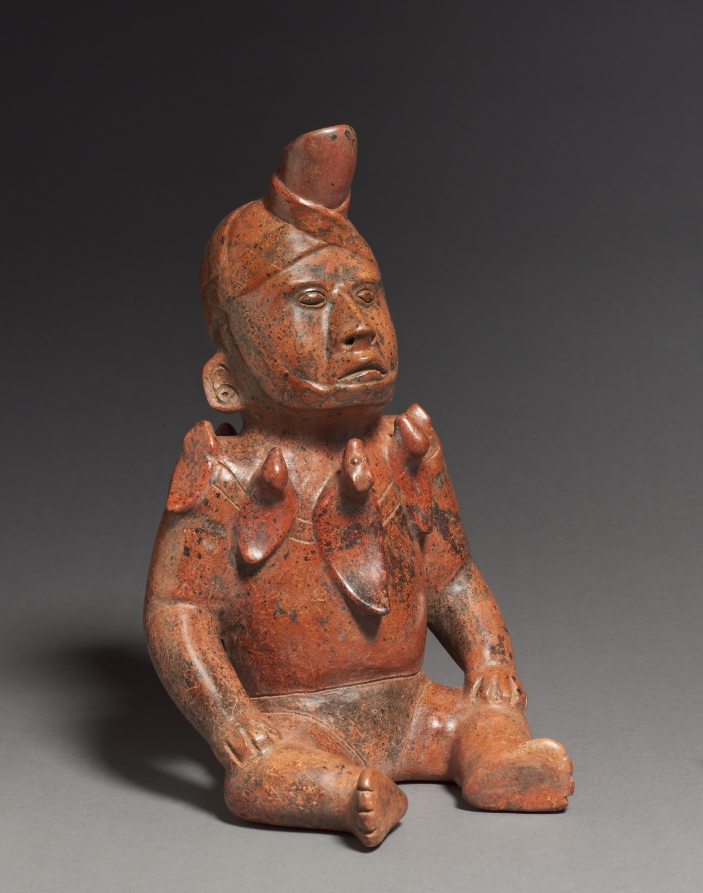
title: "Horned" Male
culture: West Mexico, Colima, Comala style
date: 100 BCE–300 CE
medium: earthenware with colored slips, black burial deposits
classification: Sculpture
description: This figure’s concentrated, otherworldly expression is emphasized by the hornlike element strapped to its forehead. This "horn" may be the spire of a conch shell, which comes from water and, therefore, refers to fertility—likely an important ritual concern of West Mexican chiefs. The element also could represent the "horn of power" worn in some areas of the world by shamans, the spiritual leaders and healers of small, nonindustrial societies.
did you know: This figure’s “horn” may be the spire of a conch shell, a reference to fertility.